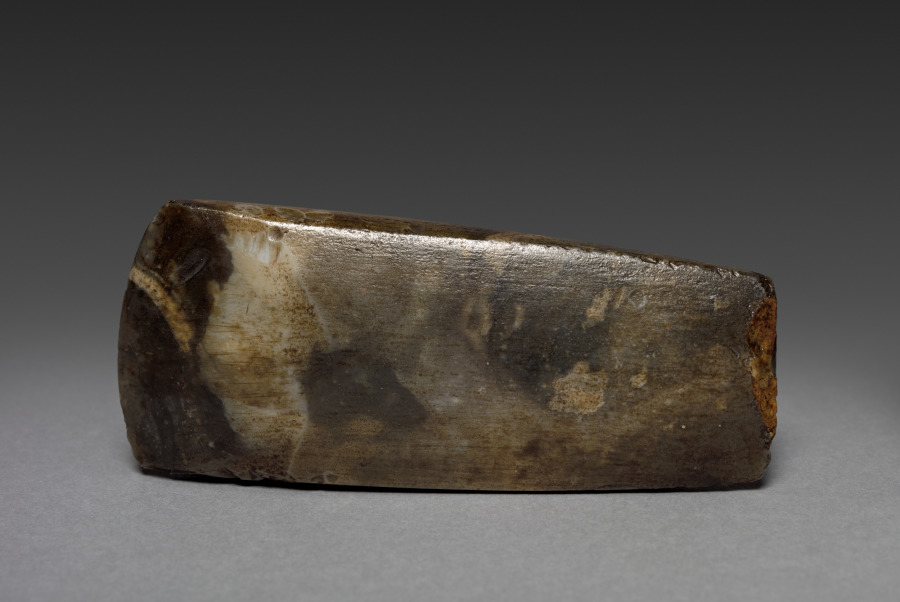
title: Hatchet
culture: Germany, Austria, Celt, Neolithic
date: 7000–1700 BCE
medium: flint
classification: Stone